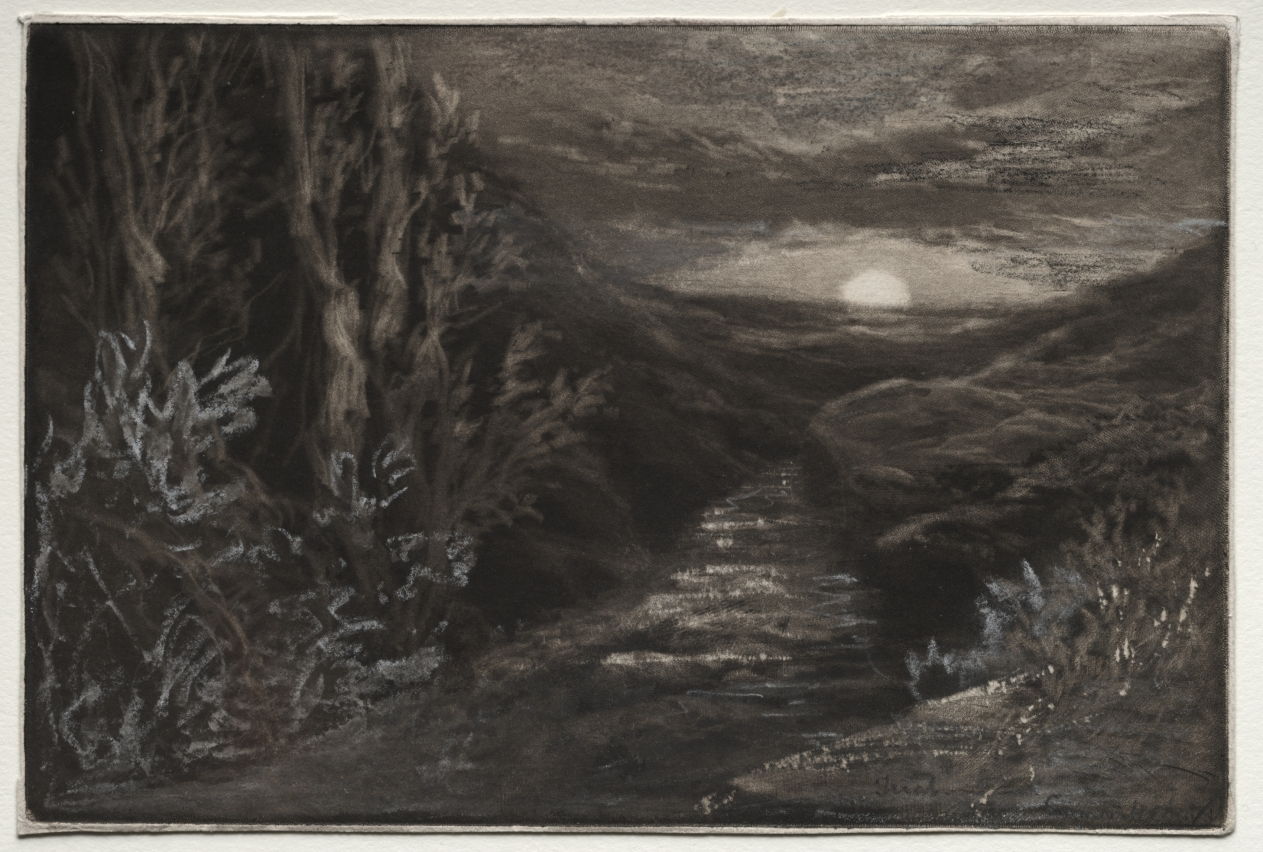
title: A Moorland Stream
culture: England, 19th century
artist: Francis Seymour Haden (British, 1818–1910)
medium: mezzotint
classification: Print